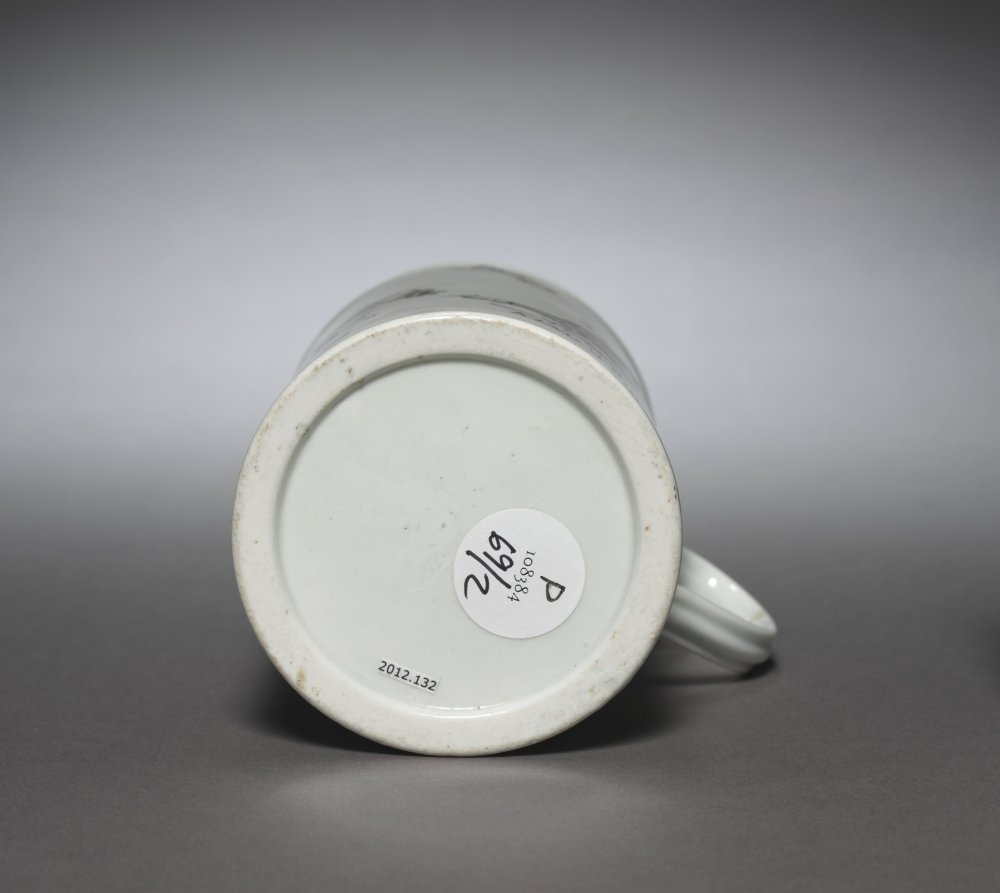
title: Cann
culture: England, 18th century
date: c. 1775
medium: ceramic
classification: Ceramic